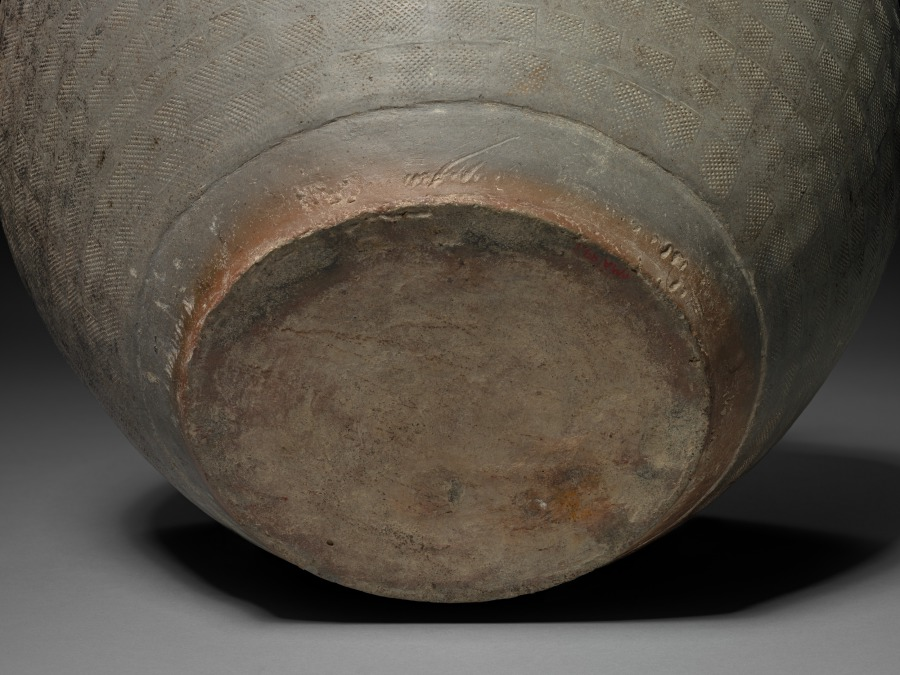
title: Jar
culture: China, Zhejiang province, Eastern Han dynasty (25–220 CE)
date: 25–220 CE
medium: stoneware with impressed decoration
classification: Ceramic